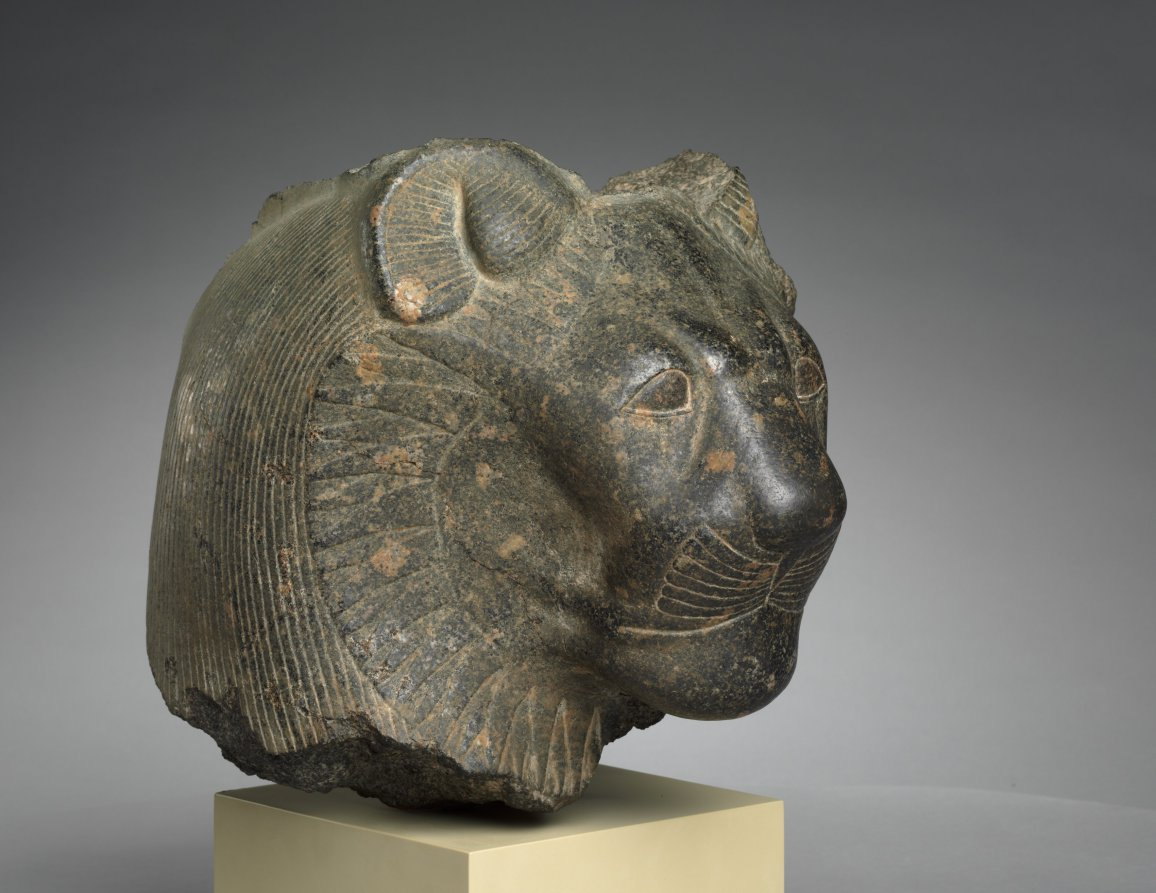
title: Head of Sekhmet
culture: Egypt, Thebes(?), New Kingdom (1540–1069 BCE), Dynasty 18, reign of Amenhotep III (1390–1352 BCE)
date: c. 1391–1353 BCE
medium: granodiorite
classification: Sculpture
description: This lioness head once belonged to a grand statue of the goddess Sekhmet, "the powerful one," probably seated and wearing a tight dress. Possibly appealing to her healing aspect, Pharaoh Amenhotep III, often described as “beloved of Sekhmet,” commissioned and dedicated hundreds of large granodiorite Sekhmet sculptures in his Theban mortuary temple. Thus, this head likely comes from Thebes, perhaps later moved across the Nile—like many such sculptures—to the temple of Mut, a related deity, at Karnak. Behind her stylized ruff, Sekhmet wears a wig, once crowned with a sun disk and uraeus, the stylized cobra symbolizing royal or divine power.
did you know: Amenhotep III may have dedicated 730 statues of Sekhmet, two for each day of the year.